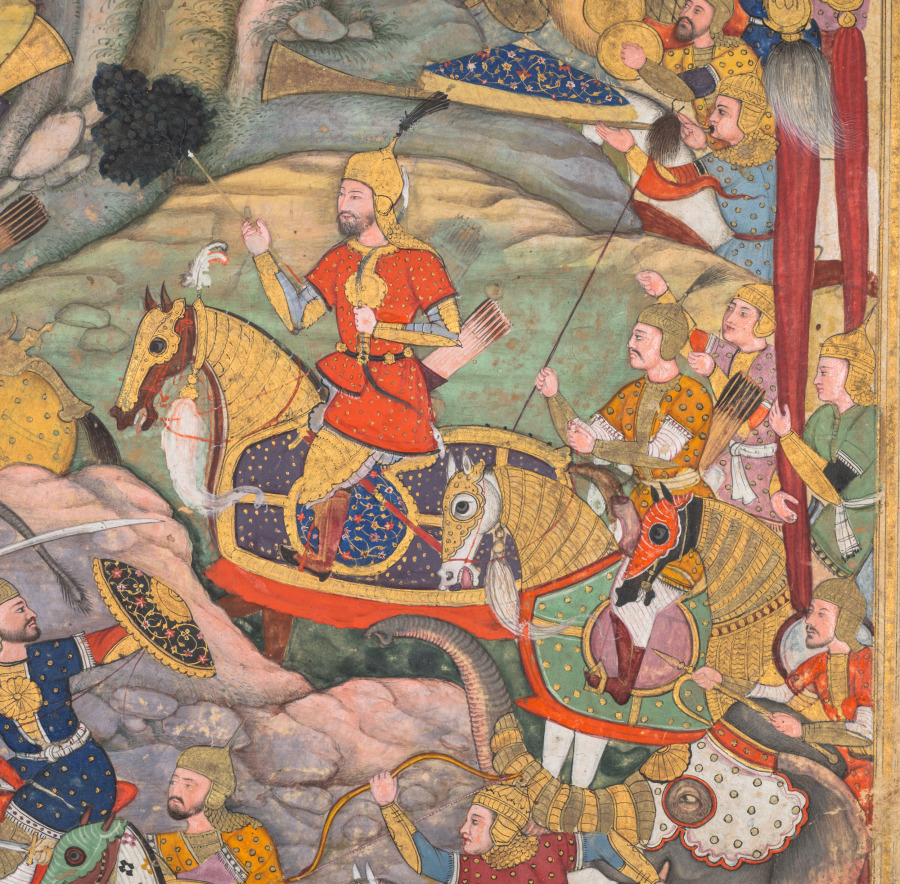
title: Mughal ruler Humayun defeating the Afghans before reconquering India, folio from an Akbar-nama (Book of Akbar) of Abu’l Fazl (Indian, 1551–1602)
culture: Mughal India, court of Akbar (reigned 1556–1605)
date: c. 1590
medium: Gum tempera, ink, and gold on paper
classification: Painting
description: In a battle that took place in 1555, the second Mughal emperor, Humayun, reconquered northern India from the Afghans with the help of Iranian military forces. His mounted figure stands out from the fray, with his golden helmet and red tunic silhouetted against a hillside in the upper center of the composition. To illustrate the beginning of hisown biography, Humayun’s son Akbar included this image of his father riding victoriously back to India. The scene never actually occurred in this way, since Humayun did not participate in this particular battle; his inclusion here is symbolic.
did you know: A well-trained war elephant can pull an opponent off his horse with its trunk.